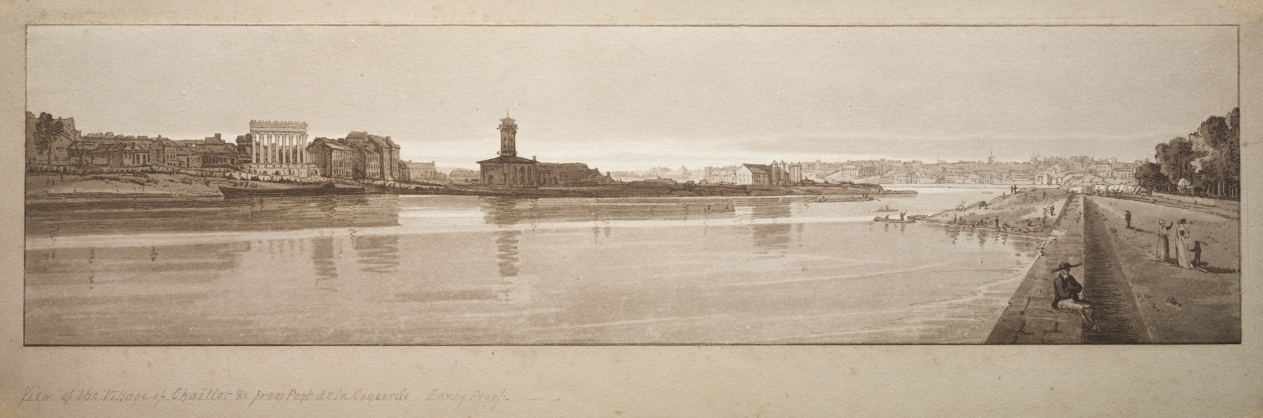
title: A Selection of Twenty of the Most Picturesque Views in Paris: View of the Village of Chaillot, &c taken from Pont de la Concorde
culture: England, 19th century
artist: Thomas Girtin (British, 1775–1802)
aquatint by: Frederick Christian Lewis (British, 1779–1856)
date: 1802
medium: softground etching and aquatint, printed in brown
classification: Print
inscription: Lower margin, in pencil: View of the Village of Chaillot from Pont de la Concorde Early proof